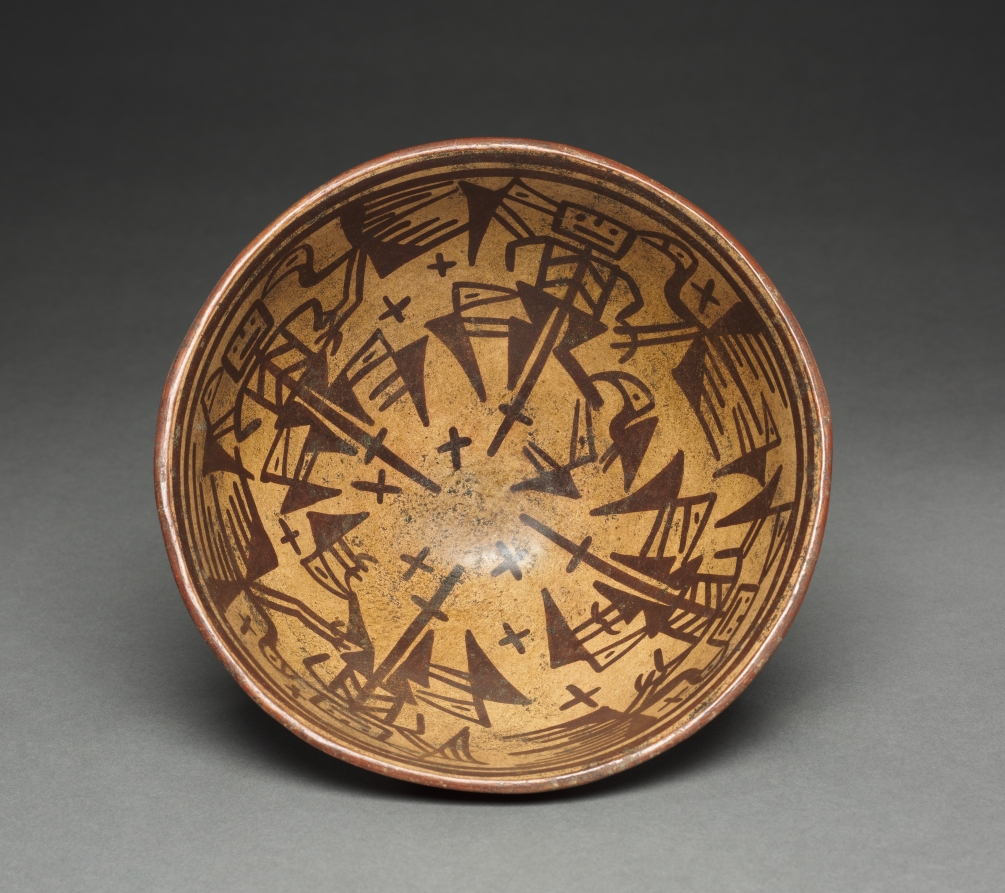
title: Bowl with Humans and Birds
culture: Colombia, Highland Nariño region,Tuza style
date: c. 1250–1550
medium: earthenware with colored slips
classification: Ceramic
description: In the Nariño region of southwestern Colombia, the dead were buried in shaft tombs, the most elaborate up to sixty feet deep and furnished with offerings such as these bowls. Colombian ceramics are not much studied and little can be said about their imagery, which reveals a keen interest in geometric abstraction. Depicted here are a row of figures with thatch-roofed huts, humans attacked by birds, and spiders.